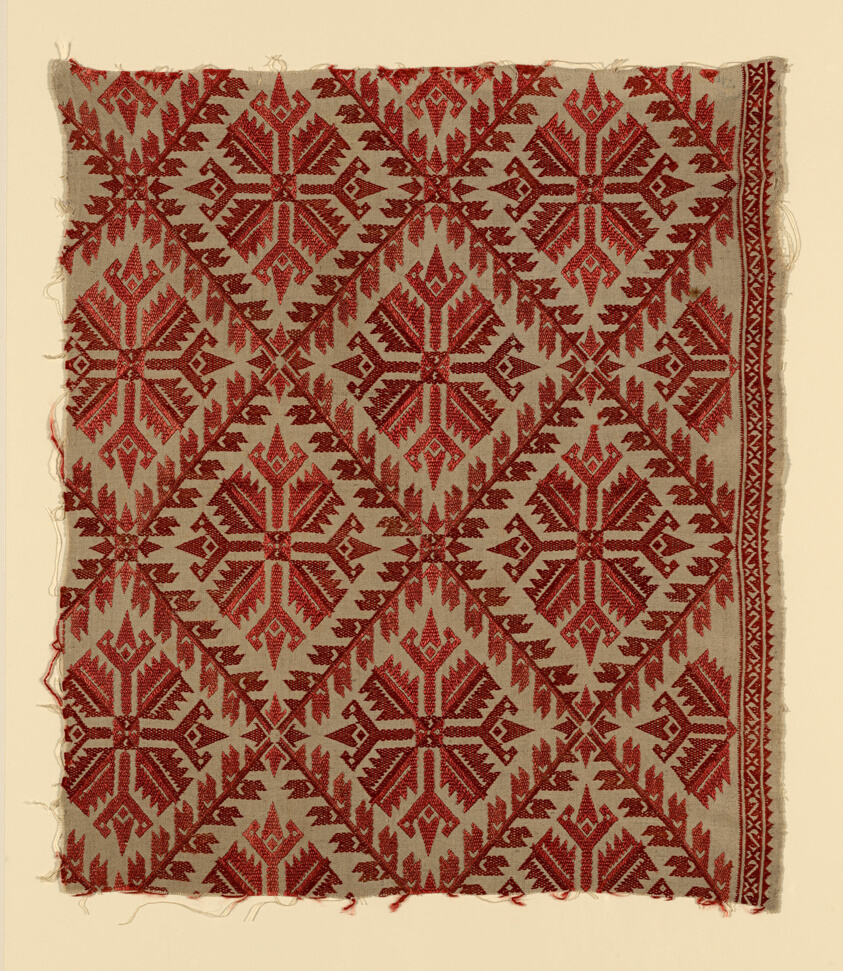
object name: Textile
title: Fragment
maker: Greece, Cyclades Islands, Naxos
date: 18th century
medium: Linen, plain weave; embroidered with silk in running stitches (pattern darning)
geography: Náxos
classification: textile; needlework (visual works)